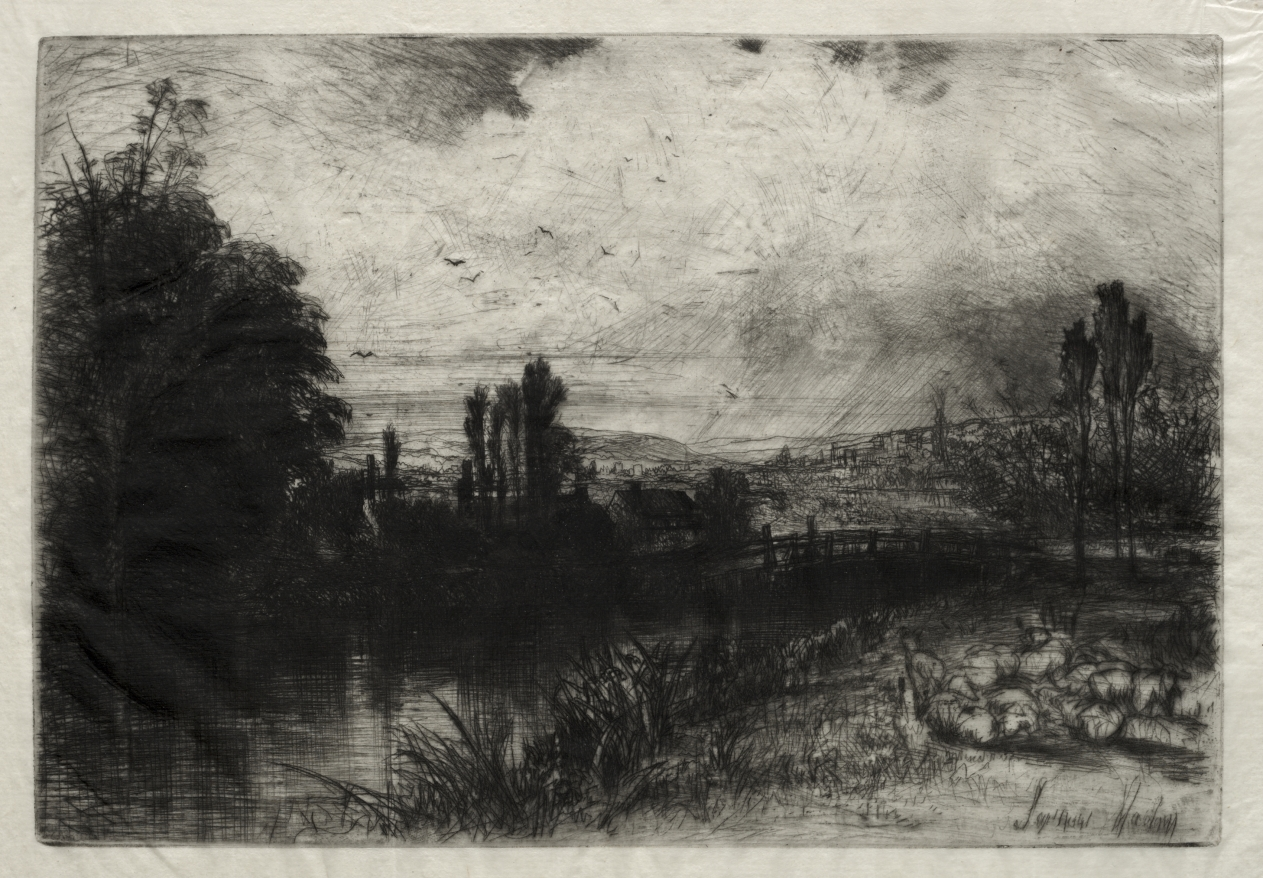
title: On the Test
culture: England, 19th century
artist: Francis Seymour Haden (British, 1818–1910)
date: 1859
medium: etching and drypoint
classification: Print